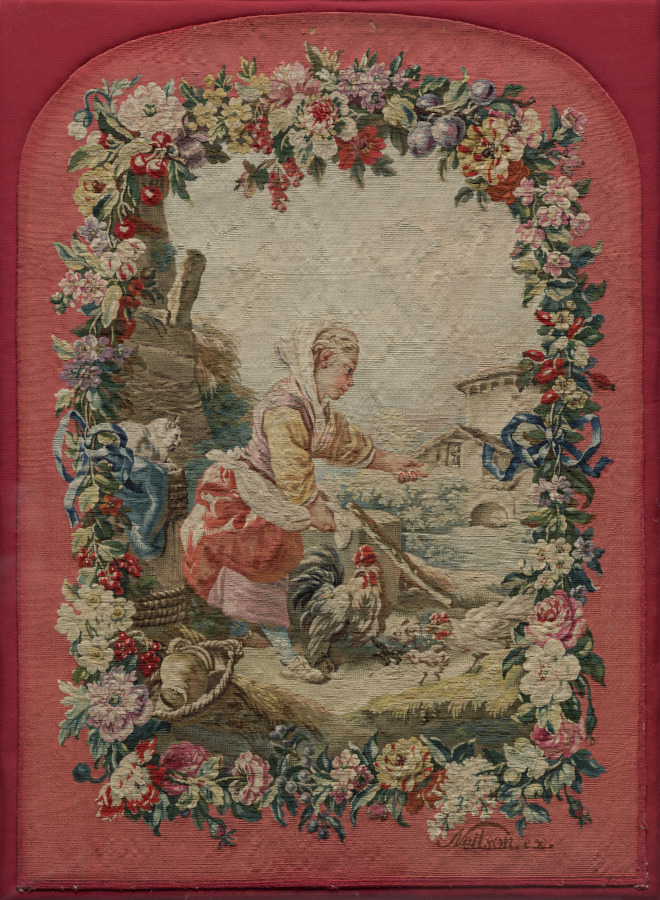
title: Fire Screen Panel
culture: France, 18th century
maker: Jacques Neilson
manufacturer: Gobelins Manufactory (France, Paris, est. 1662)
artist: after a design by Jean-Baptiste Marie Hüet (French, 1745–1811)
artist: after a design by Maurice Jacques (French, 1712–1784)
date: c. 1775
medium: tapestry weave: silk and wool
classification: Textile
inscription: lower right: "Neilson. ex.."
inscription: Woven into textile: Neilson. ex.